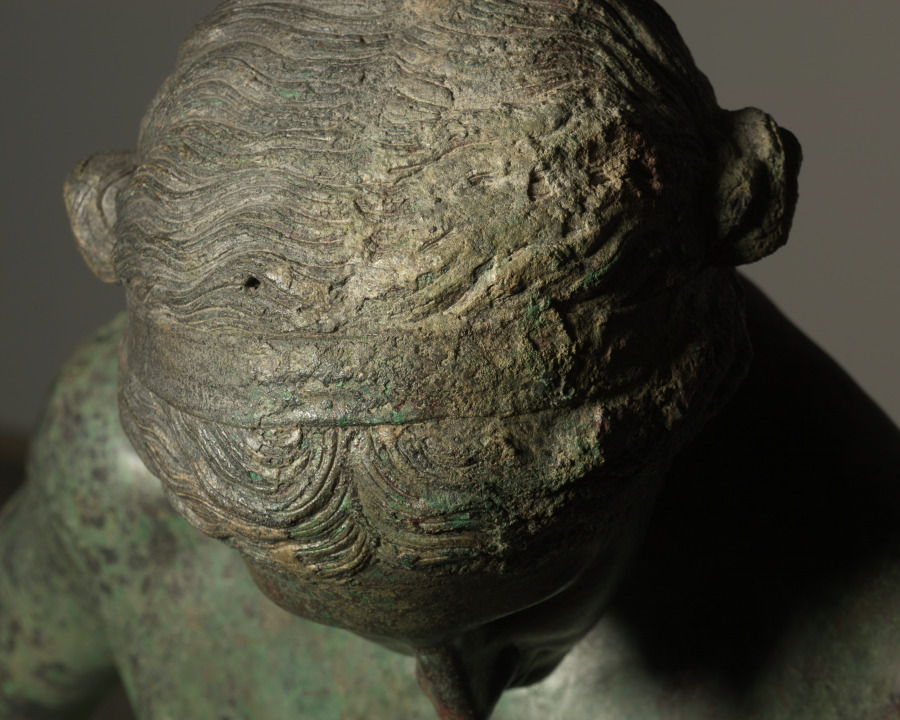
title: The Cleveland Apollo: Apollo Sauroktonos (Lizard-Slayer) or Apollo the Python-Slayer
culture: Greece, Athens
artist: attributed to Praxiteles (Greek, Athenian, c. 400–330 BCE)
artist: or Follower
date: c. 350–200 BCE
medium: bronze, copper and stone inlay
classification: Sculpture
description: The Cleveland Apollo was cast in multiple sections using the indirect lost-wax technique. First, molds were taken from a working model (now no longer known or preserved), which was then reproduced in hollow wax sections, each filled with a clay core. After details were added to the wax models, each was encased in clay. Then, the wax was heated, melted out, and replaced by molten bronze. Once cooled, the hollow bronze sections were fused together and finished, patching flaws and adding inlays and other details. Since the initial model was retained, it could be reused, allowing ancient sculptors to create multiples and variations of favorite works. Thus, remarkably, the Cleveland Apollo may once have been one of several such works. The consistently thin walls of the Cleveland Apollo (mostly 5-6 mm thick), together with the nearly invisible joins between most cast sections, show that it was created by highly skilled sculptors and foundry workers. Close looking reveals several noteworthy features. First, ovals atop the right foot mark a fusion weld, where molten bronze pooled to join separately cast sections. Second, small rectangular bronze patches cover parts of the surface (especially the right hip), each carefully cut and then hammered into place over holes or other casting defects. Inlaid lips, nipples, and eyes (the right ancient stone, the left now a modern replacement) added to the lifelike appearance of the sculpture, contrasting with the once bronze-colored skin. Finally, radiography helps to illuminate hidden features, such as the cast edge of the neck of Apollo.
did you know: Ovals across the top of the right foot show a clear join between separately cast sections.